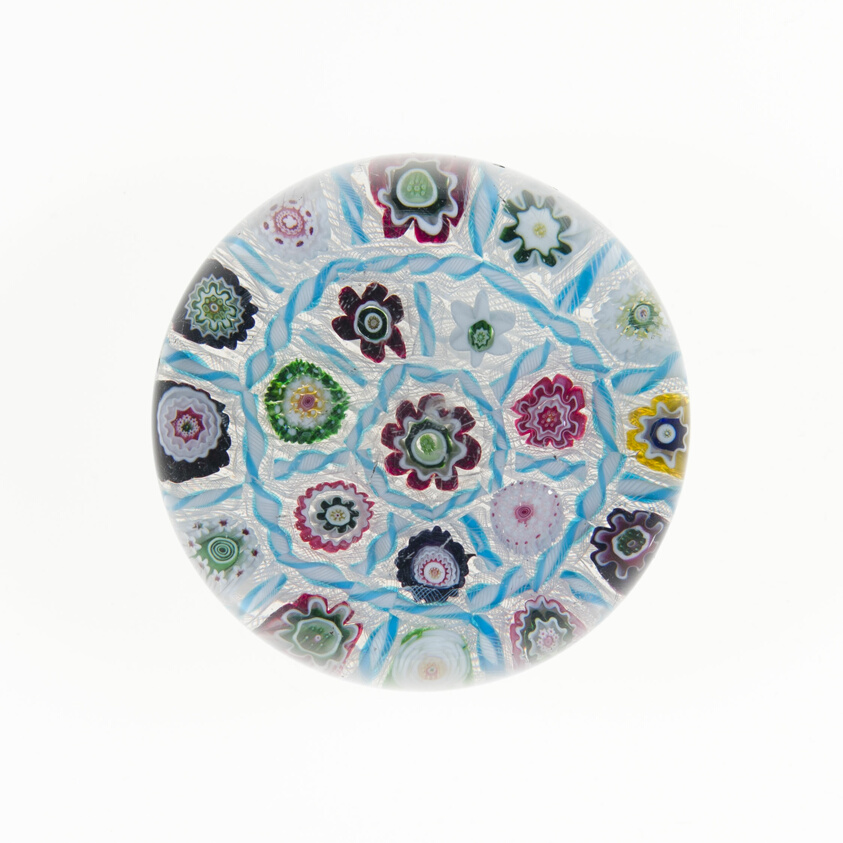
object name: Glass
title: Paperweight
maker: Clichy Glassworks (Cristalleries de Clichy); Clichy, France, 1837-1885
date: 19th century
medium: Glass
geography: Clichy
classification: paperweight; millefiori; european decorative arts; glass